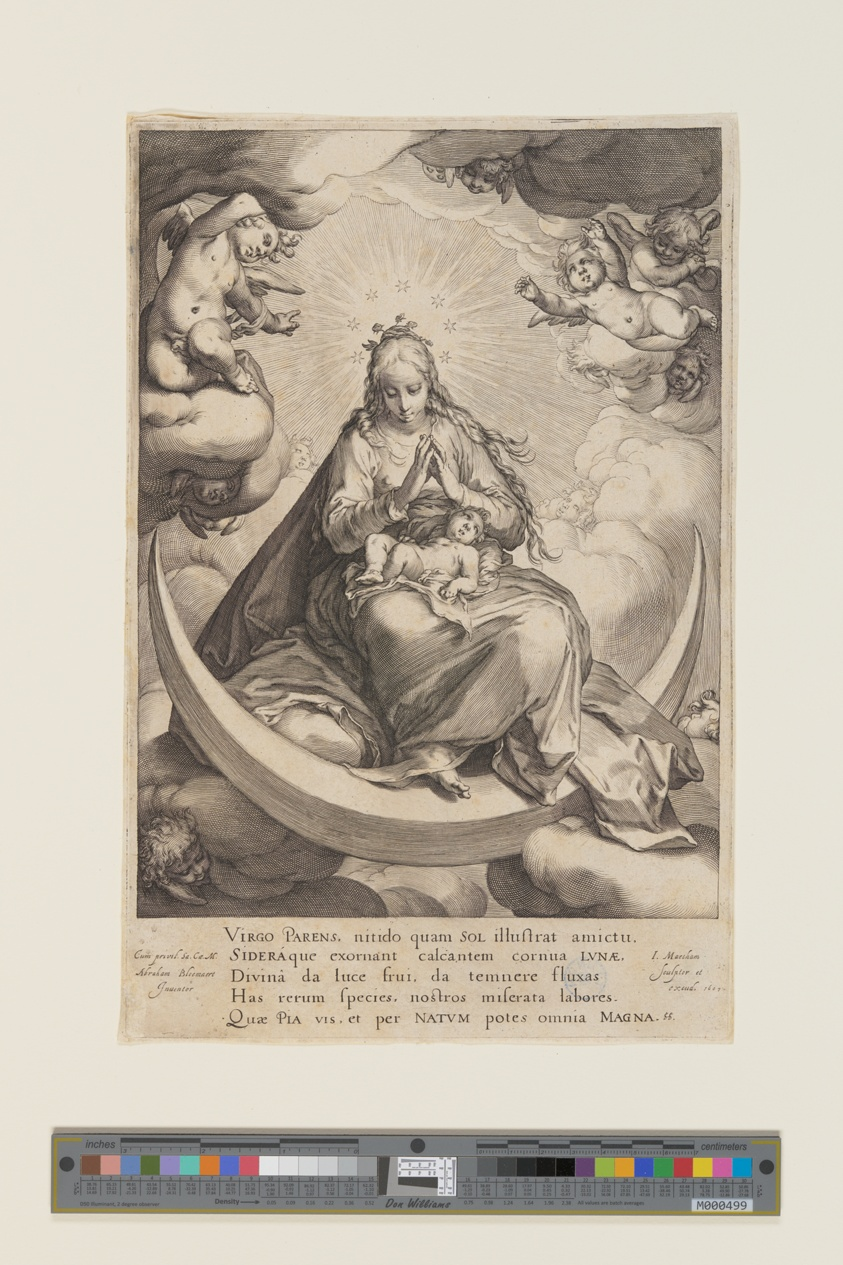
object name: Print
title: The Virgin and the Child on the Crescent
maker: Jacob Matham (Dutch, 1571–1631); after Abraham Bloemaert (Dutch, 1566–1651)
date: 1607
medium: Engraving on ivory laid paper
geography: Netherlands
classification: print; paper; prints and drawing; engraving